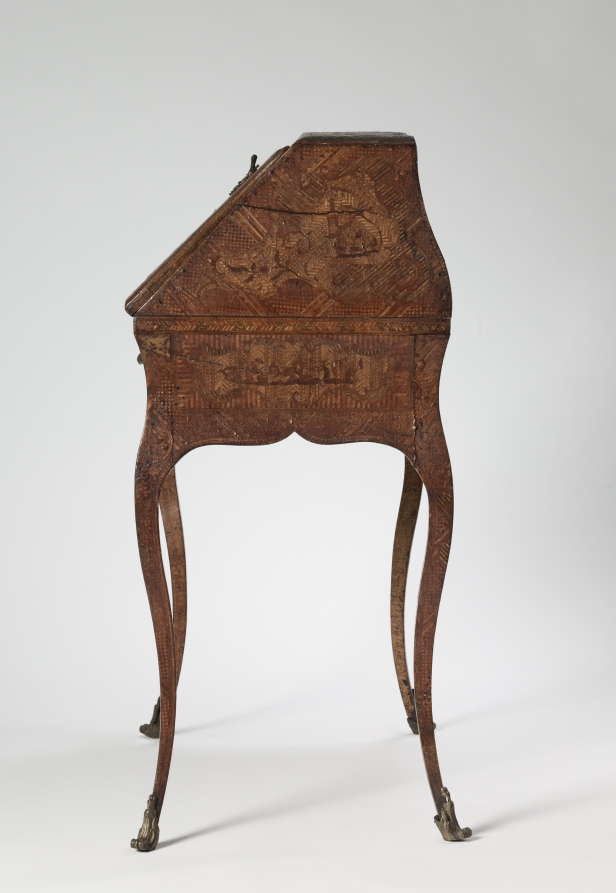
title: Ladies Writing Desk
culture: Possibly Northern Italy, near France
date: c. 1750–75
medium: Oak with straw marquetry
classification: Furniture and woodwork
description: As early as the beginning of the 17th century, straw marquetry was being produced throughout Europe. Along with cabinetmakers and specialized artisans, creators of straw marquetry included home artisans, nuns, monks, and noble dilettantes. Thus the quality and design of objects using straw marquetry is quite diverse. While some pieces appear nearly naive, others are made very masterfully, such as with this ladies writing desk. Some of these objects were even presented in royal cabinets of wonder. Because of its silky gloss and bright colors, straw marquetry was held in great esteem as unusual and remarkable decoration for furniture and other objects on par with gemstones, tortoiseshell, or ivory.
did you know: The surface of this ladies writing desk is completely covered with straw marquetry decoration both outside and in.